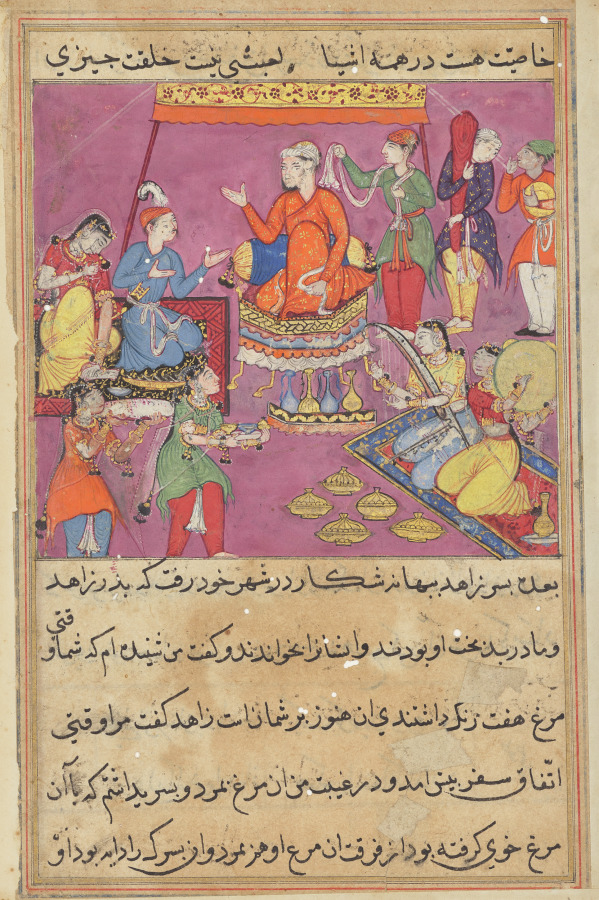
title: The king gives his daughter in marriage to the pious man’s son, from a Tuti-nama (Tales of a Parrot): Fifty-second Night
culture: Mughal India, court of Akbar (reigned 1556–1605)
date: c. 1560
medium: gum tempera, ink, and gold on paper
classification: Painting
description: The king sits on his throne at the center of his bustling court. On the right, two musicians play instruments while other servants attend to the royal celebration. The pious man’s son, seated on the left, has successfully killed the dragon that menaced the king’s lands. As a reward, he is married to the king’s daughter and named vice-regent.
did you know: The musicians play a harp and a tambourine.